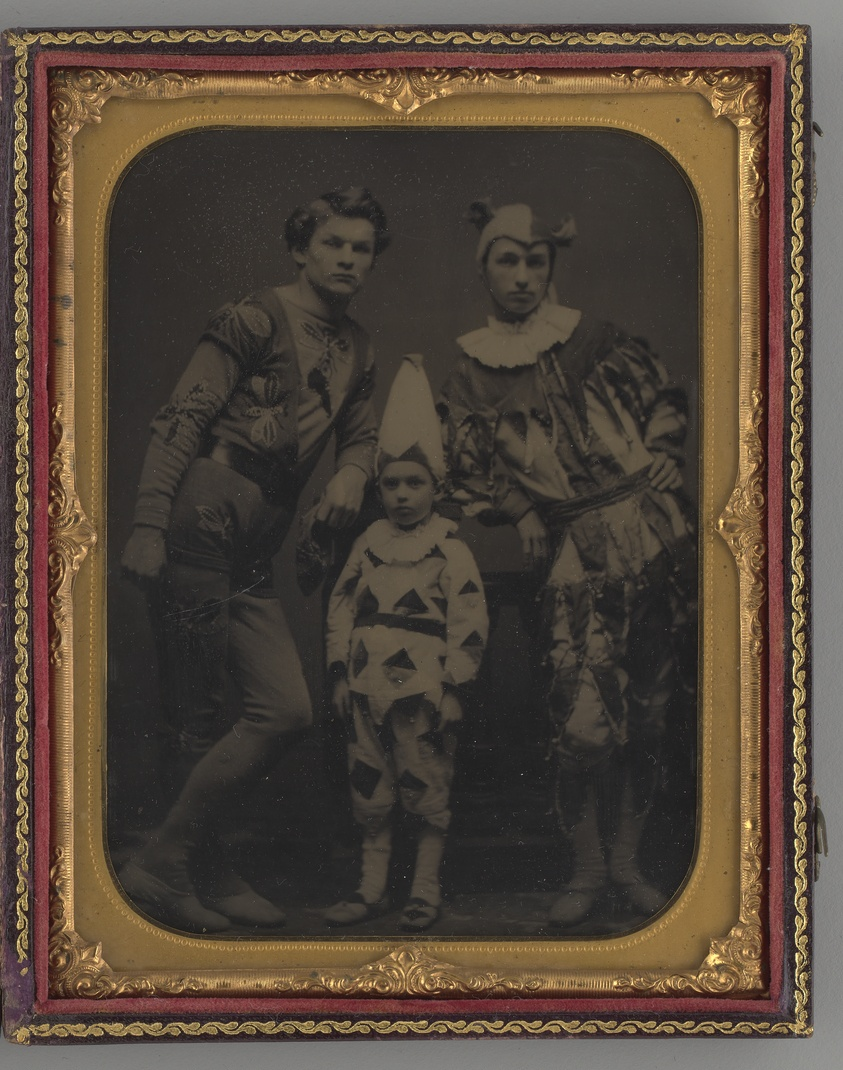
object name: Photograph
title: Untitled (Portrait of two Men and one Boy, Dressed in Clown Costumes)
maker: Unknown maker; American, 19th century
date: 1865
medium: Tintype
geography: United States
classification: portrait; photograph; tintype; portrait; photographic process; photography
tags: lundberg collection, acrobats, circuses, clowns, portrait, portraits, portraits: male subject, portraits: multiple subjects